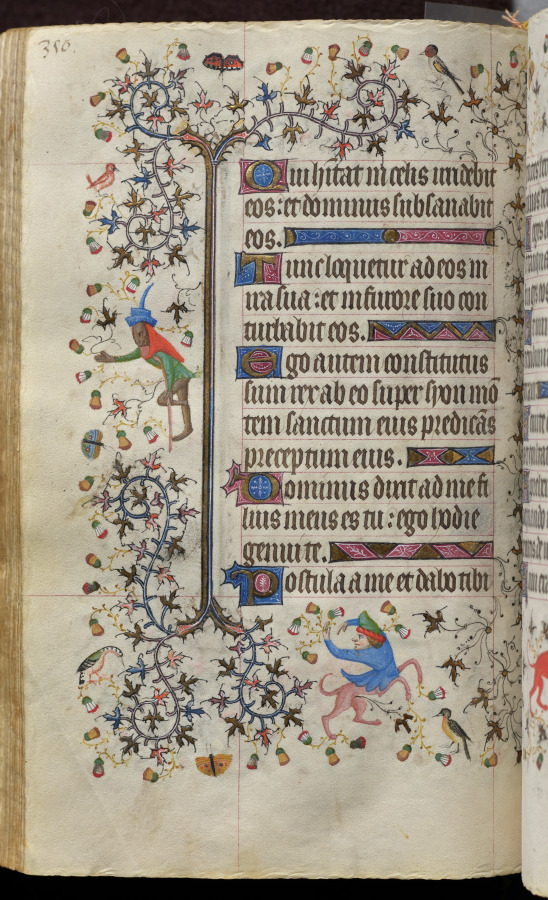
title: Hours of Charles the Noble, King of Navarre (1361-1425): fol. 170v, Text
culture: France, Paris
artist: Master of the Brussels Initials and Associates (French)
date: c. 1405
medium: ink, tempera, and gold on vellum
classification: Bound Volume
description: This precious volume was obviously highly prized by its owner, the French-born King of Navarre, who had his coat of arms painted on no less than twenty folios. Rather than directly commissioning this manuscript from a specific workshop, it seems that Charles the Noble acquired his book of hours -- perhaps ready-made for the luxury market -- while on a trip to Paris in 1404-05. A collaborative effort, six painting styles are evidenced within the pages of this codex, those of two Italians, two Frenchmen, and two Netherlanders. The painter who was responsible for the planning and decoration of the book, and who produced seventeen of the large miniatures, was a Bolognese artist known as the Master of the Brussels Initials. His principal assistant, responsible for most of the borders, was a Florentine who signed his name "Zecho" da Firenze on folio 208 verso.